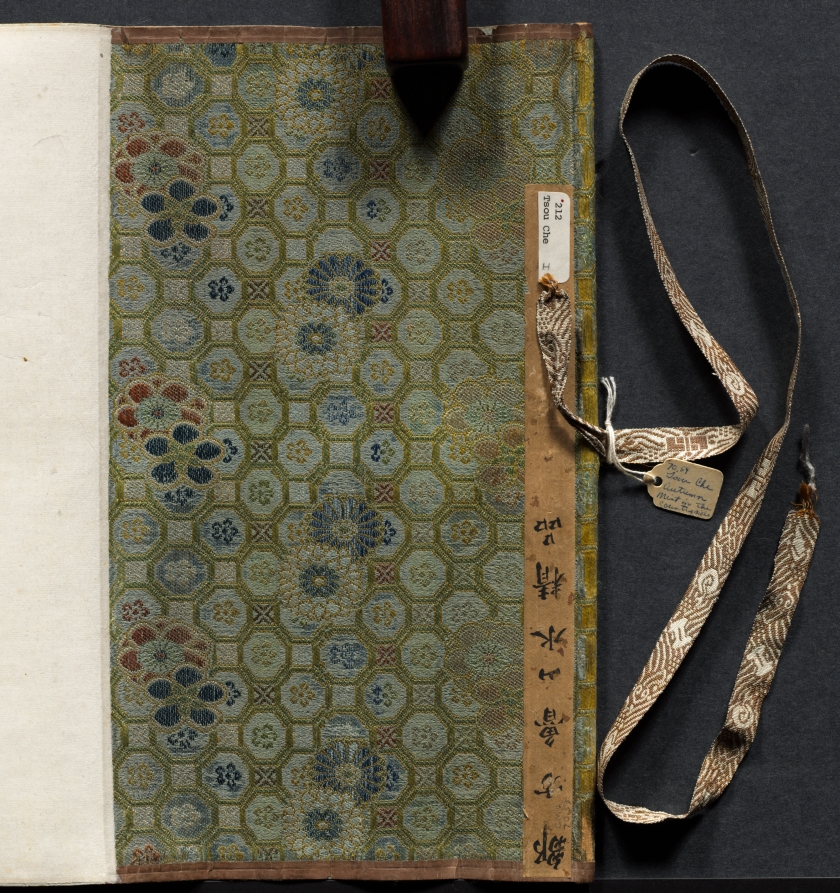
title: Autumn Mist in the Countryside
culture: China, Qing dynasty (1644-1911)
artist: Zou Zhe (Chinese, c. 1610-before 1688)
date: 1647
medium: handscroll, ink and color on paper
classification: Painting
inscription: Artist's inscription, signature, and seal: The first day of the sixth lunar month, the ting-hai year [1647], Tsou Che painted [this]. [seal] Fang-lu.